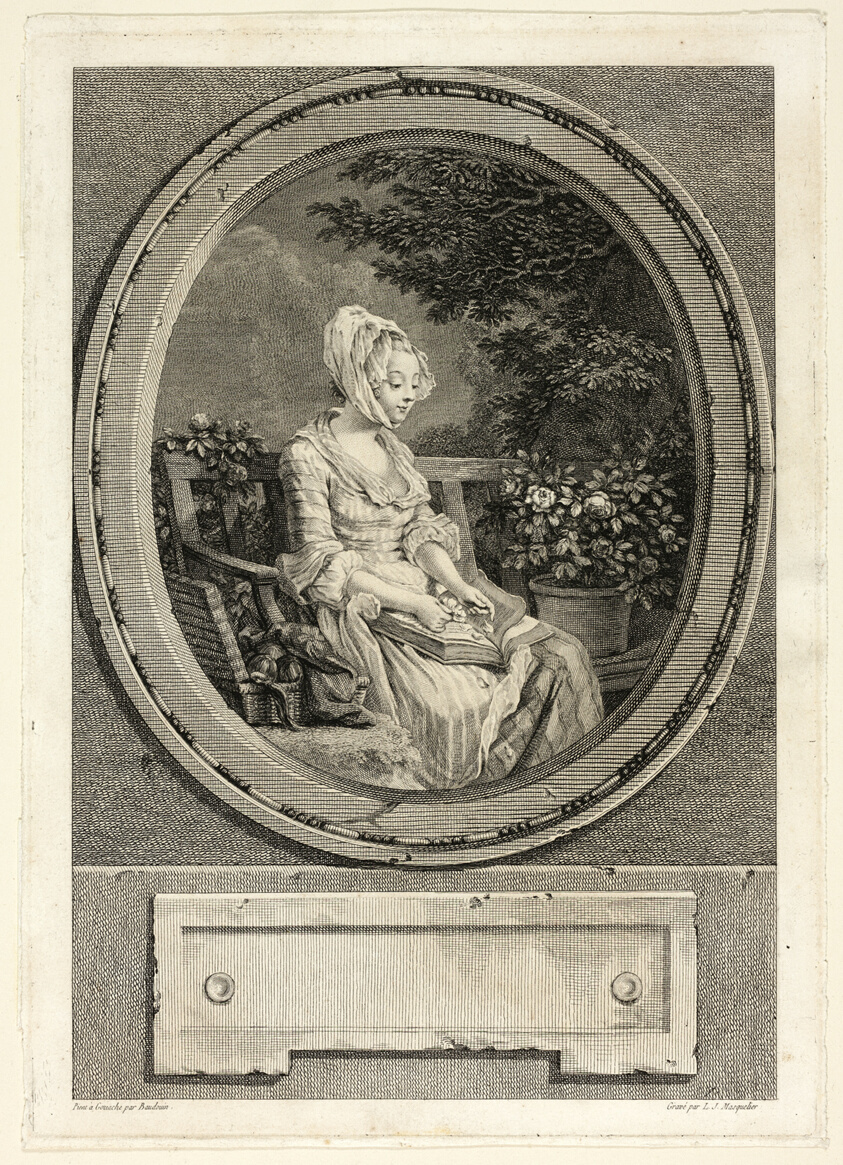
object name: Print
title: Jusque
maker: Louis-Joseph Masquelier (French, 1744-1811); after Pierre Antoine Baudouin (French, 1723-1769)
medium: Etching in black on paper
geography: France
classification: etching; print; prints and drawing